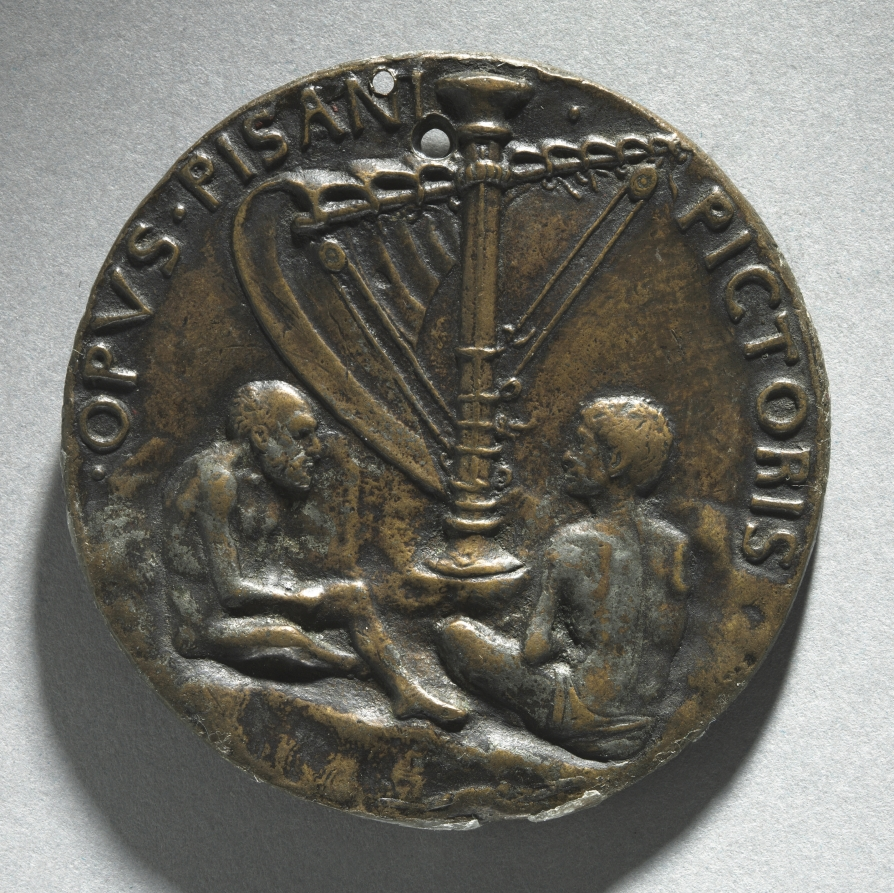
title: Portrait of Leonello D'Este, Marquess of Ferrara (reverse)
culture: Italy, 15th century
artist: Pisanello (Italian, Ferrara, c. 1395–1455)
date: c. 1440–1444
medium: bronze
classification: Sculpture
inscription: reverse: OPVS PISANI PICTORIS.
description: Renaissance medals usually show a person on the front and a symbolic element on the back, creating an overall statement about the individual. Lionello d'Este was one of the most sophisticated patrons in Renaissance Italy, and he was one of the first figures to sponsor the tradition of medals in the 1400s.